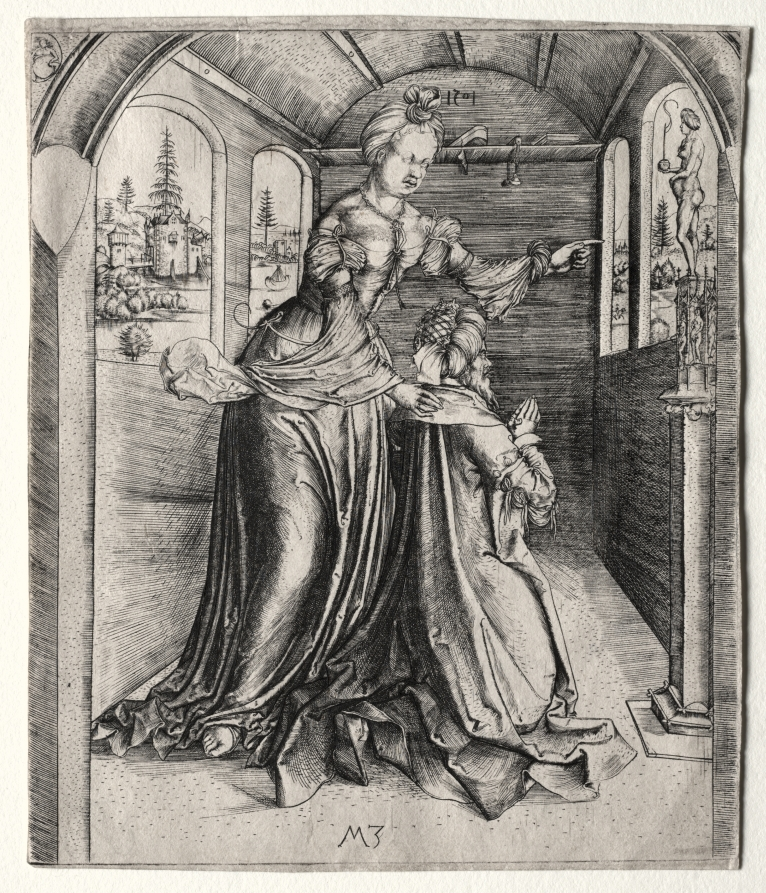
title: Solomon Worshipping Idols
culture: Germany, early 16th Century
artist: Master MZ (German)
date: 1501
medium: engraving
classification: Print